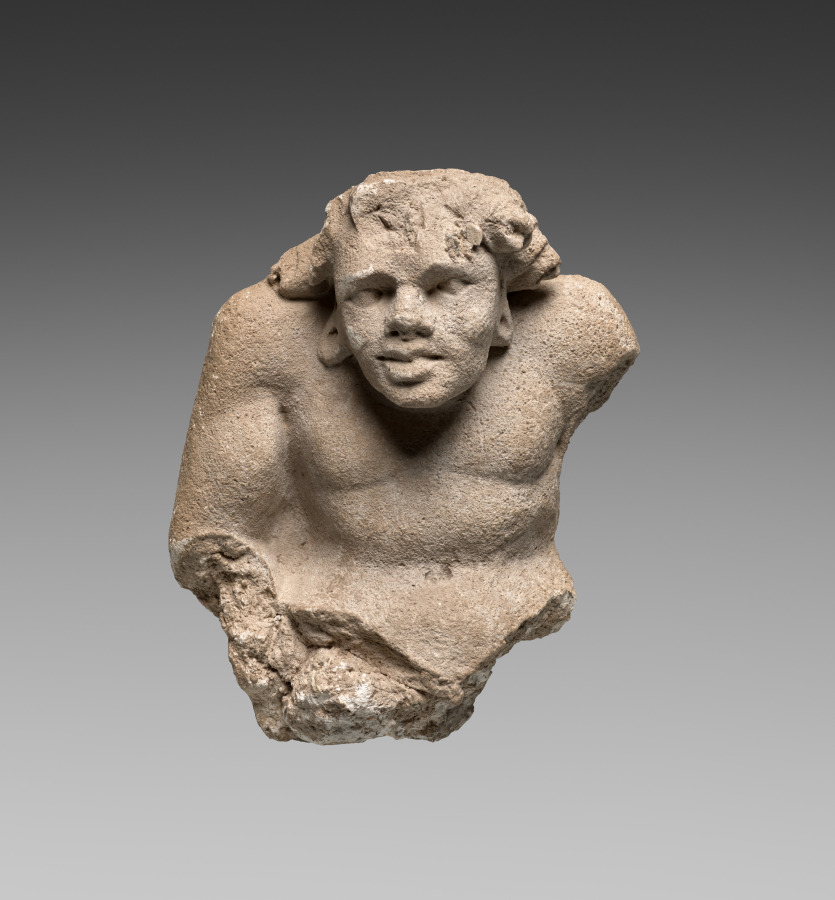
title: Male Atlantean figure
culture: Afghanistan, Hadda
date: c. 300 CE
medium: stucco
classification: Sculpture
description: The musculature, thick curly locks of hair, and deeply inset eyes of this fragmentary figure show the sculptor's incorporation of Greco-Roman forms. His hunched posture suggests that he supported a heavy weight, such as the dome of a stupa on his back. Rows of figures would have visually supported the stupa, in which relics of the Buddha or other revered Buddhist leader were interred.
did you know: Most sculptures from Hadda are preserved in museums, since the site was razed in 2001.